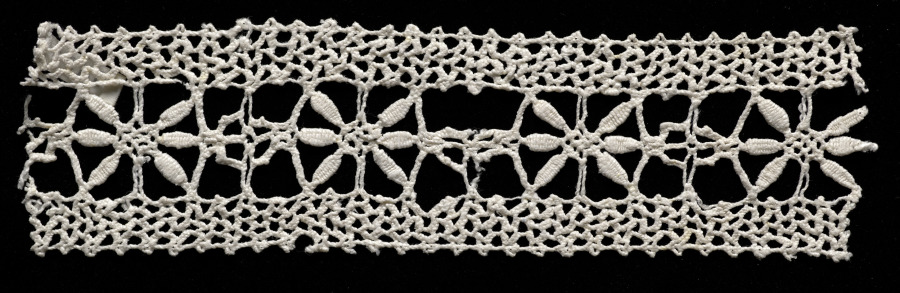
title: Lace Insertion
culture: Italy, Genoa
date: 1600s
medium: Bobbin lace (needle lace, drawnwork design)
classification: Lace